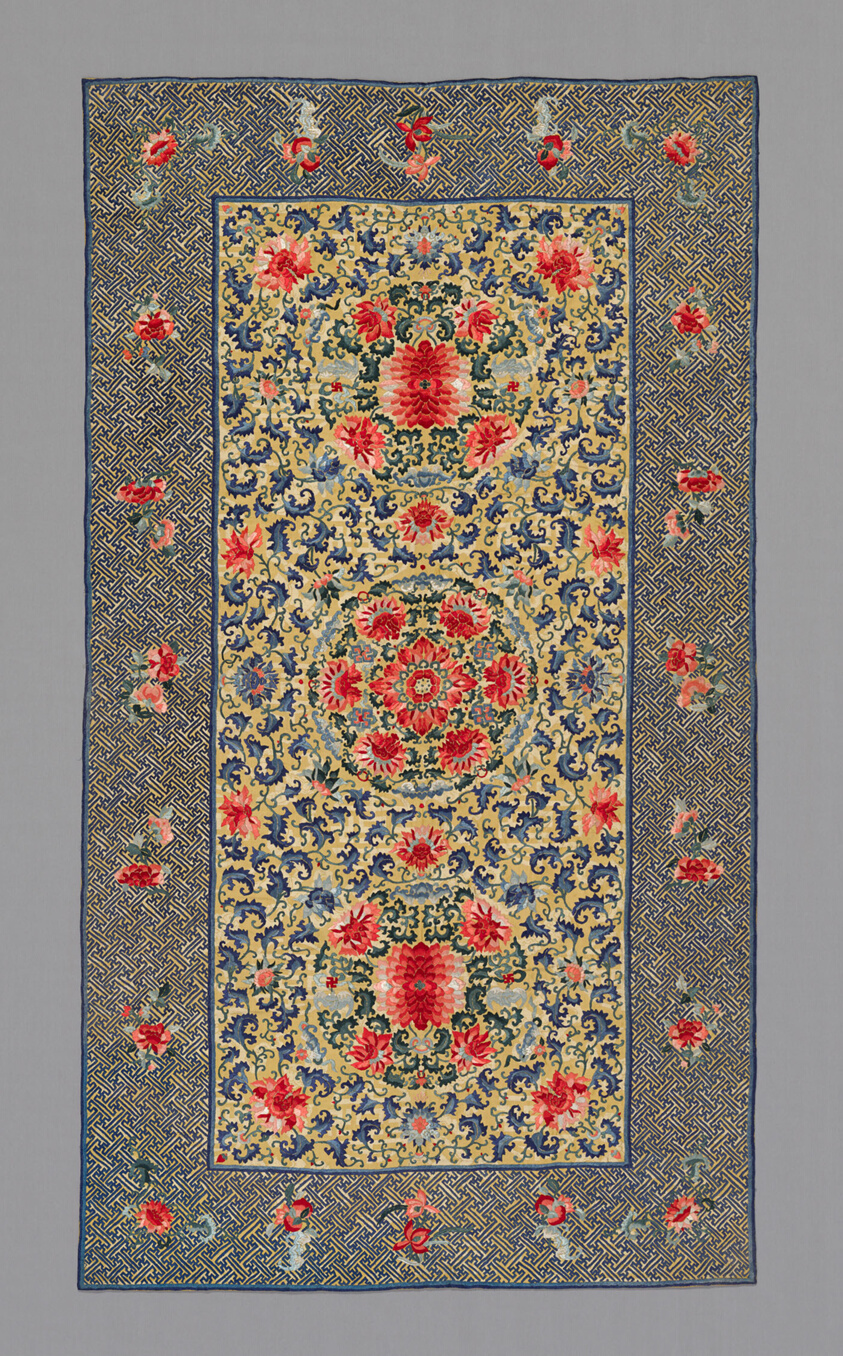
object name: Textile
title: Cover (Furnishing Fabric)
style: qing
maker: China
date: Qing dynasty (1644–1911), 1875/1900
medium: Floral design on yellow ground.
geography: China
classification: textile; weaving; needlework (visual works); furnishing textile